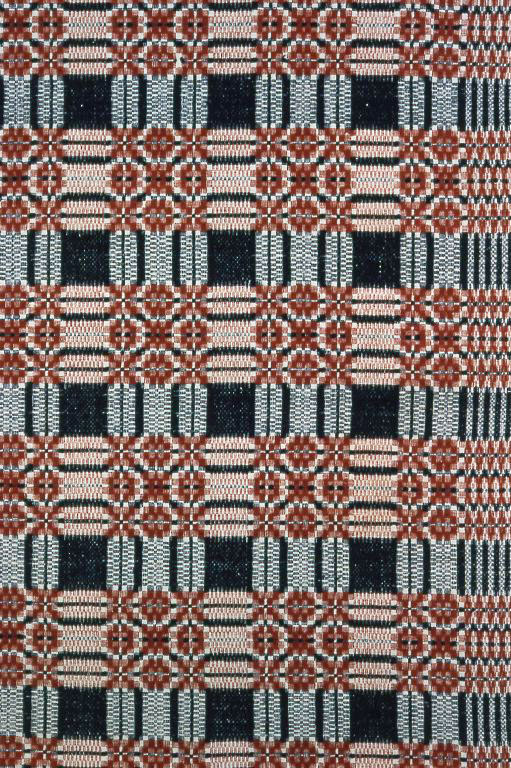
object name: Textile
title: Coverlet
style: 19th century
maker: United States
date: 1820/30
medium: Cotton and wool, plain weave with supplementary patterning wefts (overshot); two loom widths joined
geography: United States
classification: weaving - coverlet; coverlet; weaving; textile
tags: geometric motif, squares, circles, geometric, coverlet